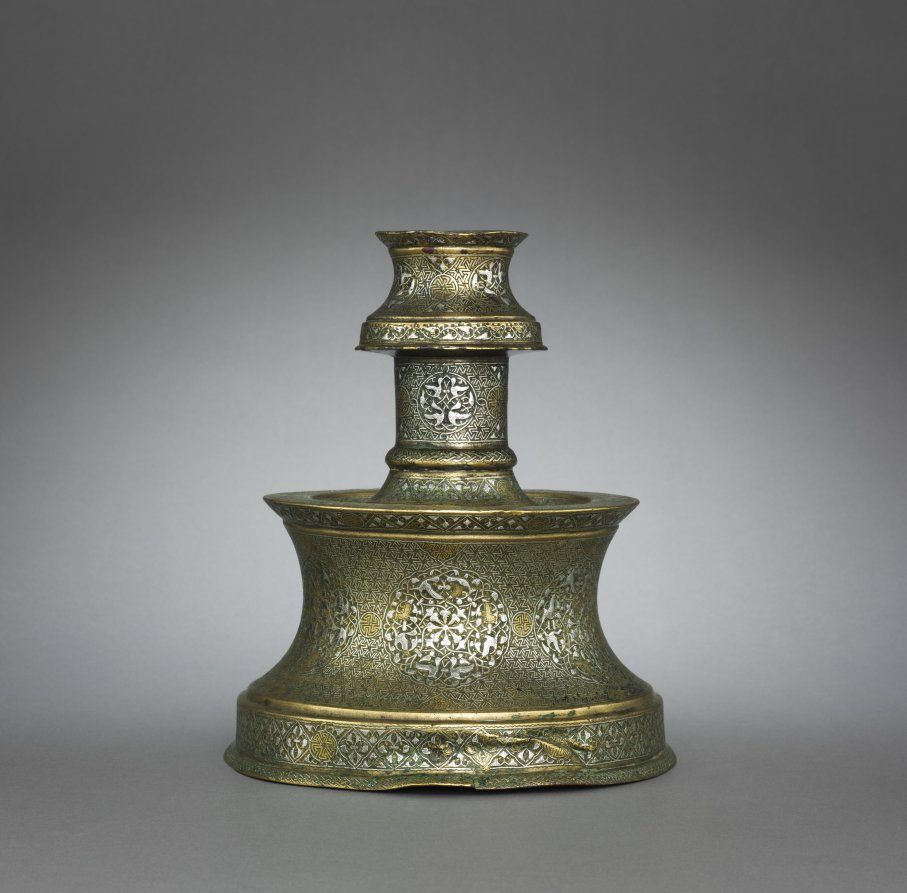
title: Candlestick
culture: Eastern Anatolia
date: 1250–1350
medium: sheet brass inlaid with silver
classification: Metalwork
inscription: none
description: Candlesticks were a common type of luxury good in the Islamic world during the medieval period. The extensive decoration on this piece is arranged in bands with roundels displaying birds in flight and leaf-like scrolls on a background of hexagonal swastikas. These ancient motifs are thought to have been sun symbols and were sometimes used as a background pattern for metalwork at this time.